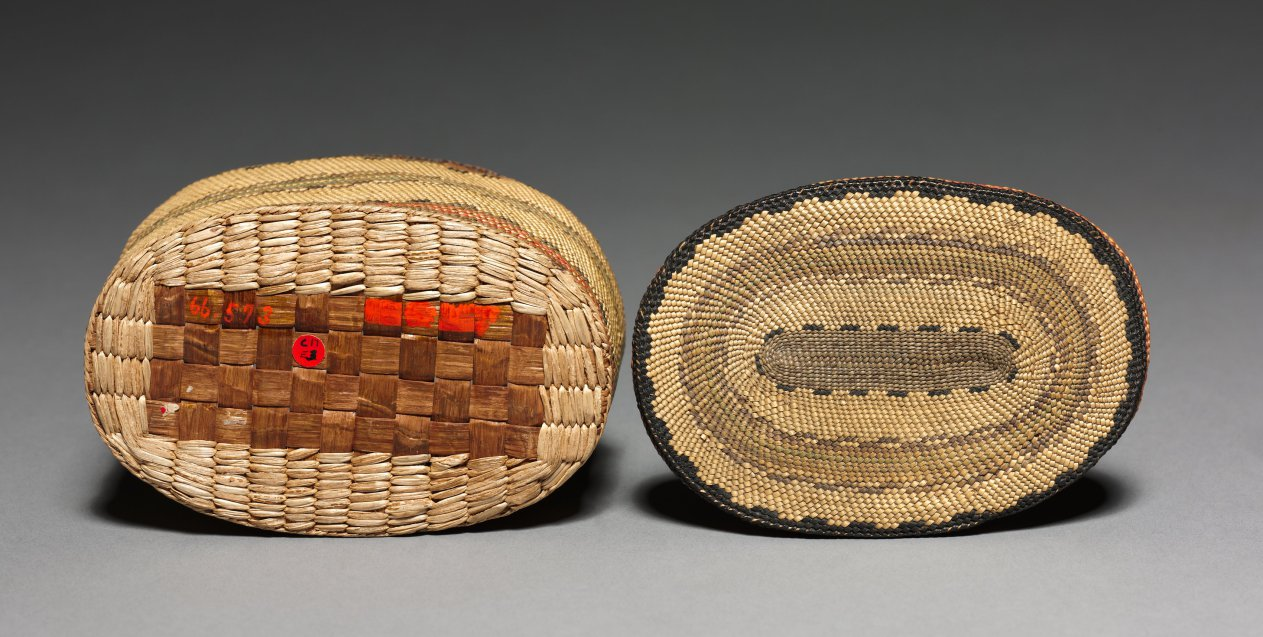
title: Lidded Bowl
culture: Northwest Coast, Vancouver Island, early 20th century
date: c 1900– 1925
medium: twined grass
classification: Basketry